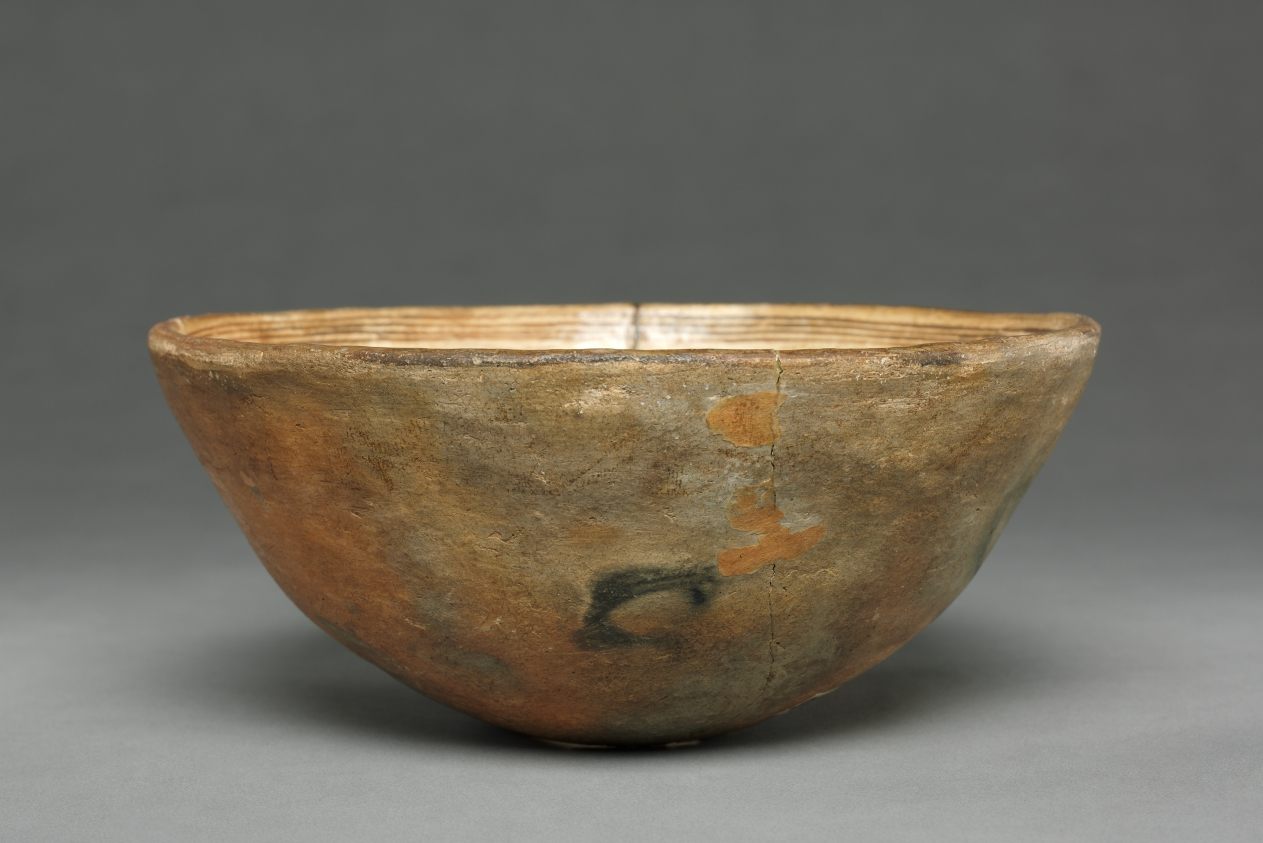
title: Bowl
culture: Southwest, New Mexico, Mimbres Valley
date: c. 1000–1200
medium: earthenware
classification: Ceramic